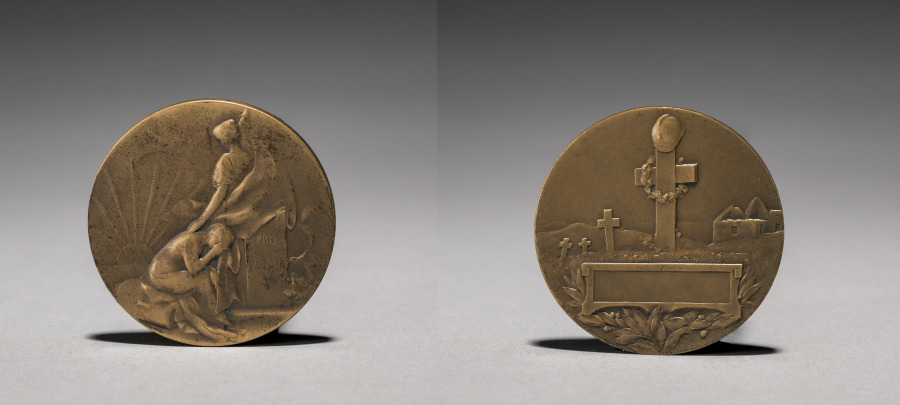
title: Medallion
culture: France, 20th century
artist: Edouard Fraisse (French, 1880–1945)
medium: bronze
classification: Metalwork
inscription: "Pro Patria" (for the fatherland); signed: "E. Fraisse."